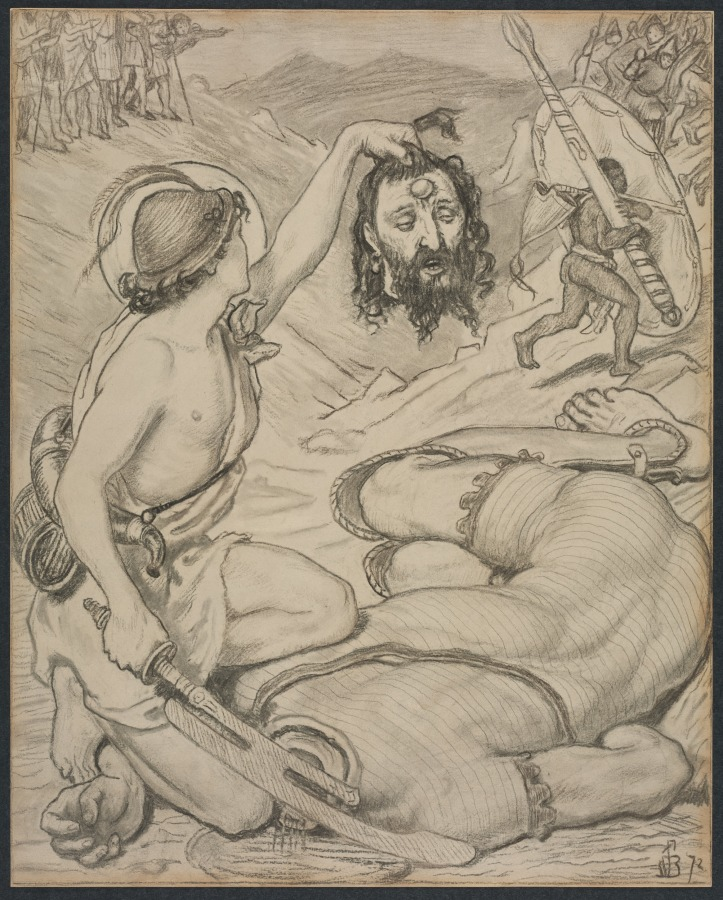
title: David and Goliath, Cartoon for Stained Glass Window at Jesus College, Cambridge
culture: England, 19th century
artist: Ford Madox Brown (British, 1821–1893)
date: 1872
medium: gray-black and brown-black charcoal, and graphite on light- to medium-weight Japanese paper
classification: Drawing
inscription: lower right, in black chalk: FMB 72 (artist's monogram)